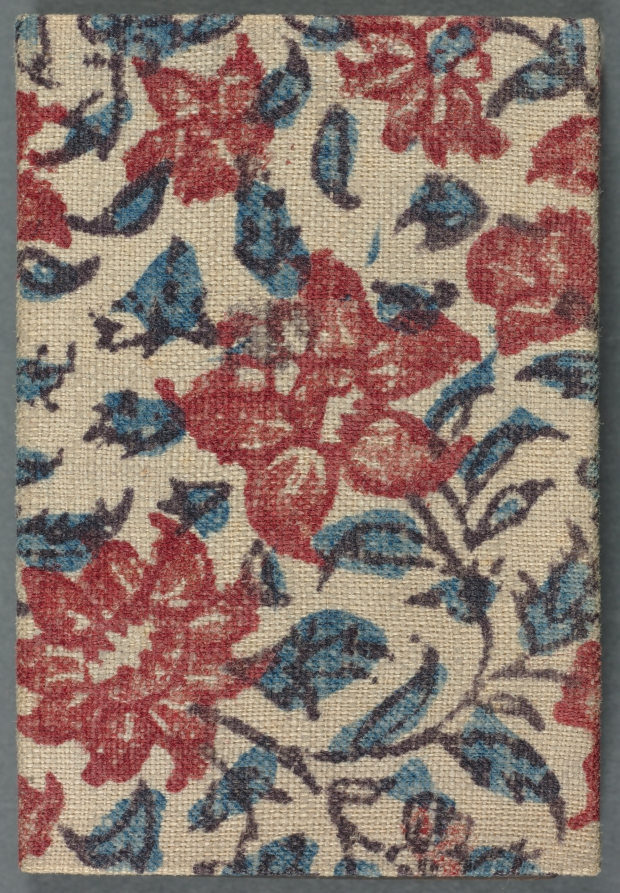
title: Miniature Album with Figures and Landscape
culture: China, Qing dynasty (1644–1911), Qianlong reign (1736–95)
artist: Zeng Yandong (Chinese, c. 1751–1827)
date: 1822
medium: Album of twelve leaves, ink and color on paper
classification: Painting